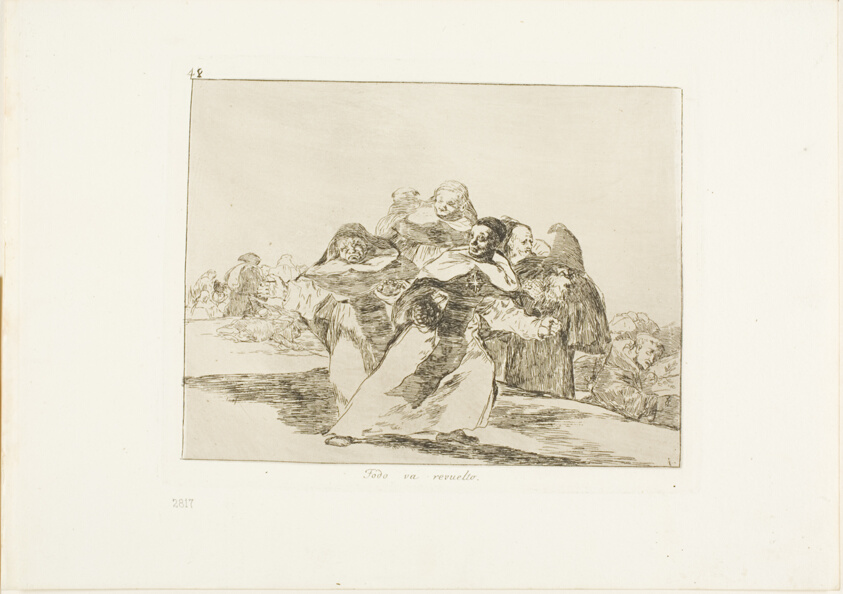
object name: Print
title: Everything is topsy-turvy, plate 42 from The Disasters of War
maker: Francisco José de Goya y Lucientes (Spanish, 1746-1828)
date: 1815/20, published 1863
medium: Etching, burin and burnishing on ivory wove paper with gilt edges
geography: Spain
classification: etching; print; prints and drawing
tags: war